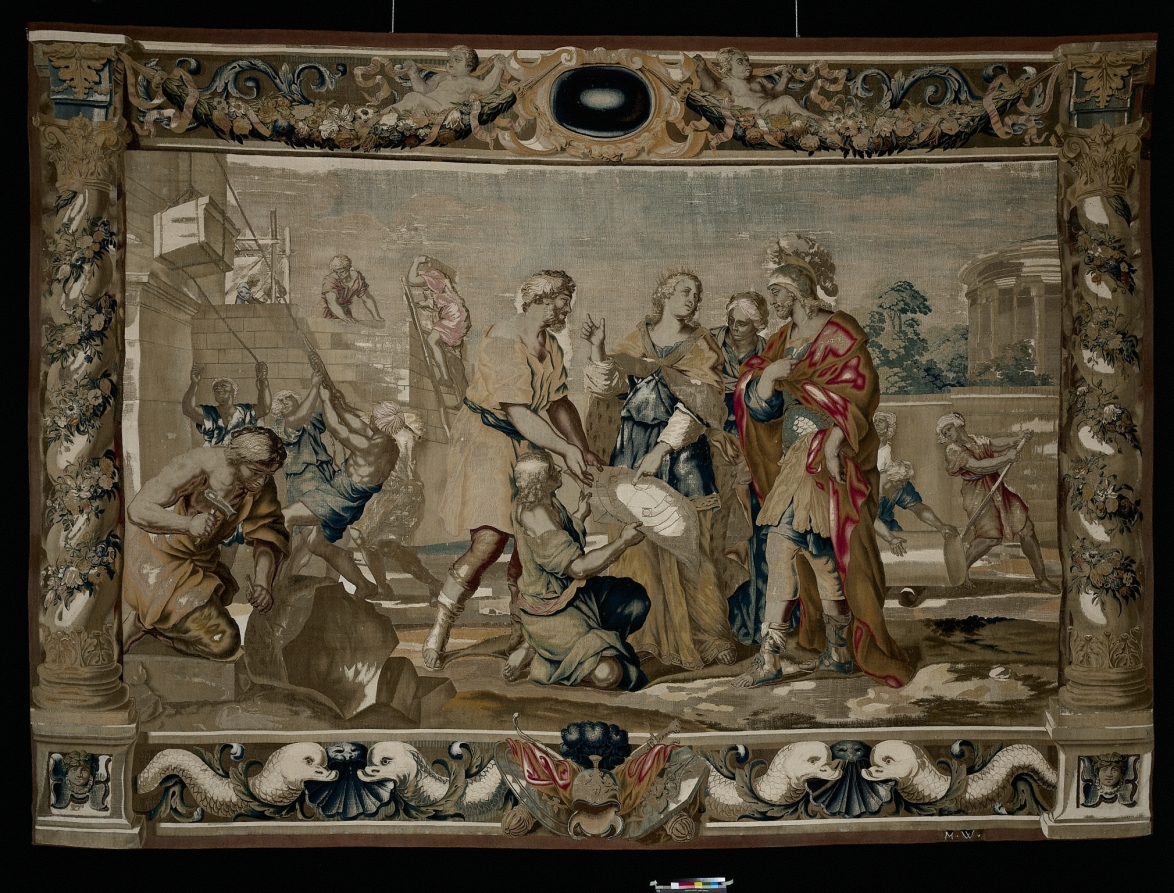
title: Dido shows Aeneas the plans for the fortifications of Carthage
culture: Belgium, 17th century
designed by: Giovanni Francesco Romanelli (Italian, 1610–1662)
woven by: Michael Wauters (Flemish, 1679)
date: 1679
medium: tapestry weave: silk and wool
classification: Tapestry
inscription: signed lower right: M. W.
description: The enamored Dido, attended by her sister Anna, shows Aeneas the building plans for Carthage which are being held by a kneeling youth and the architect.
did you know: This tapestry is one from a series of eight that depicts the tragic love story of Dido and Aeneas. They were gifted to the museum for display in the armor court.